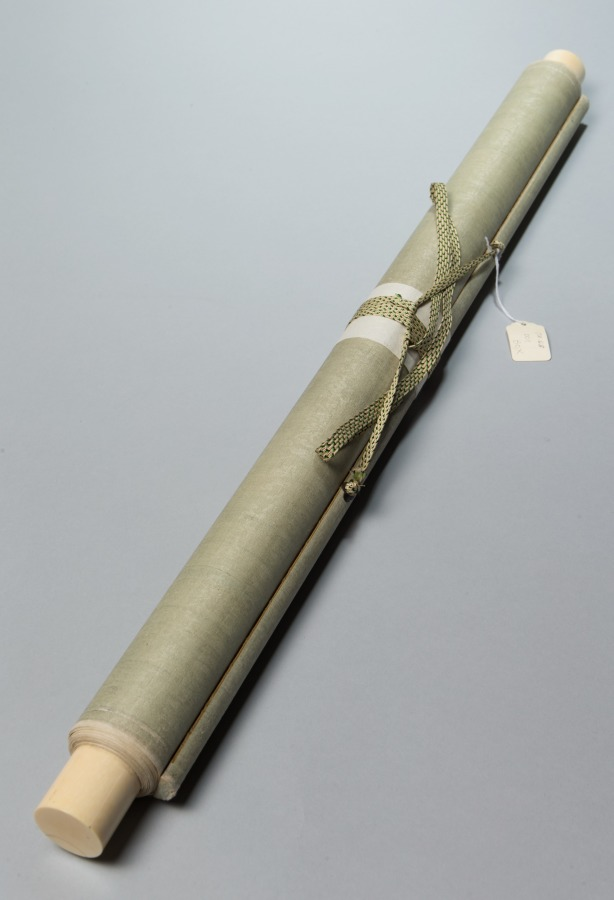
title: Solitary Colors of the Autumn Woods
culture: China, Ming dynasty (1368–1644)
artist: Wang Jianzhang (Chinese, active 1621–1662)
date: first half 1600s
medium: hanging scroll; ink and color on satin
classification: Painting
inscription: Artist's inscription, signature, and 2 seals: Cold frost falls on the fences,/ Solitary colors scatter the maples./ Reciting the chapter of "The Autumn Water,"/ I cannot still the emotion in my old heart. After the style of Fan Hua-yüan [Fan Kuan], Wang Chien-chang . [seals] Wang shih chih yin; Chien-chang. trans. LYSL/HK/WKH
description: Two gentlemen stand outside a thatched hut in a dense forest; some trees have bare branches indicating that the season is early autumn. Wang Jianzhang’s inscribed poem refers to a chapter called “Autumn Water” from Zhuangzi, a famous Daoist text written in the 3rd century BC: "Cold frost falls on the fences, / Solitary colors scatter the maples. / Reciting the chapter of “The Autumn Water,” / I cannot still the emotion in my old heart." Wang Jianzhang lived through the collapse of the Ming dynasty (1368–1644) and the rise of the Qing dynasty (1644–1911), when China was governed by the Manchus, an ethnic people from Manchuria who were traditionally viewed as “barbarians” by the Chinese. The poetic reference to Zhuangzi’s “Autumn Water” seems to discreetly convey Wang’s feelings about his country being taken over. “Autumn Water” was about learning to take steps in the foreign way, but not acquiring a foreign tongue. Perhaps Wang was lamenting his conflicted situation. For survival he had to adapt to the new political and social climate, while still trying to maintain his own identity and Chinese traditions.